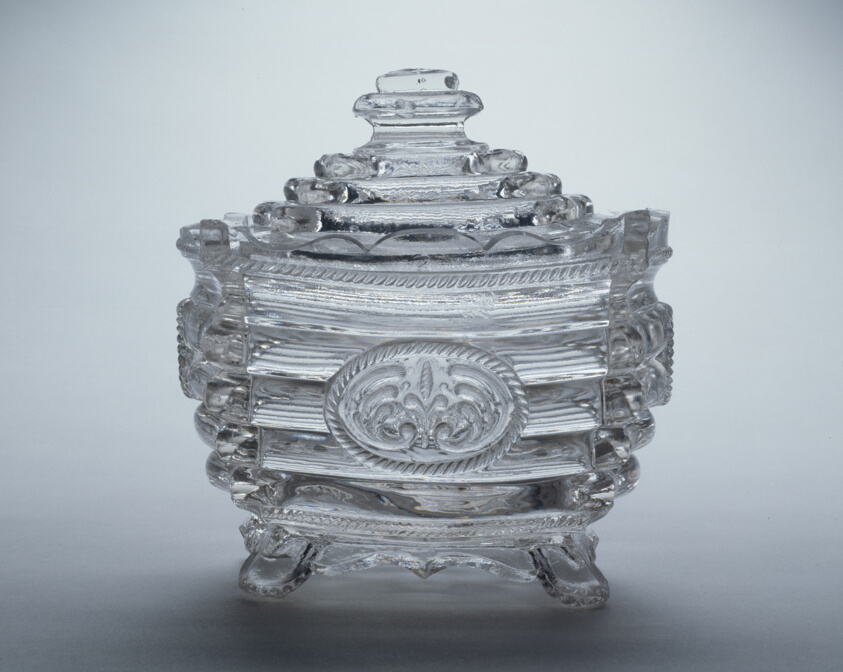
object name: Glass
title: Covered Sugar Bowl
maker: New England Glass Company; American, 1818–1888; Cambridge, Massachusetts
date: 1820–30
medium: Pressed glass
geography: East Cambridge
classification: sugar bowl; glass; american decorative arts; american arts; decorative arts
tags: dining, drinking